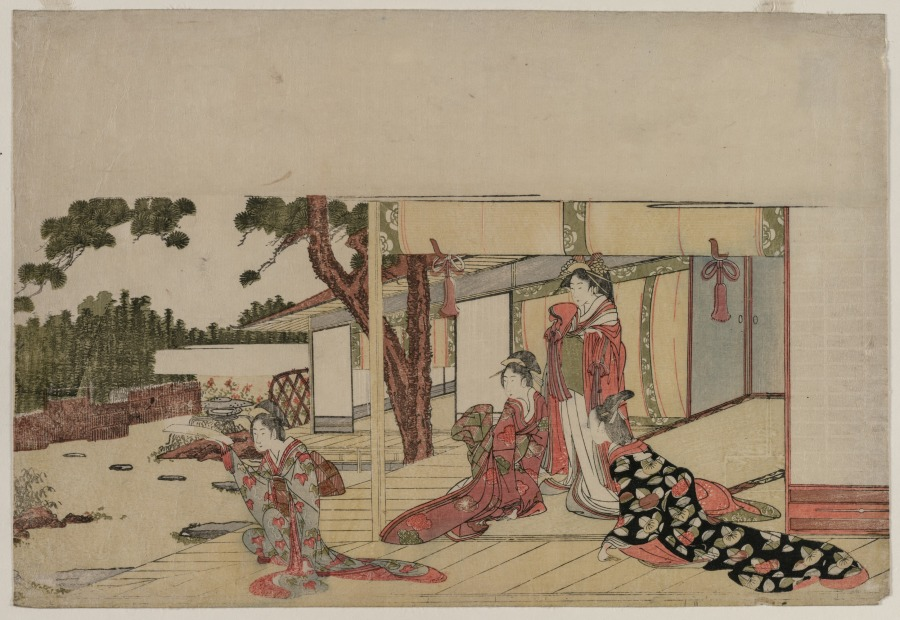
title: Women on a Veranda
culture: Japan, Edo period (1615–1868)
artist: Hishikawa Sōri III (Sōji) (Japanese)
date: c. 1800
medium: color woodblock print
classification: Print